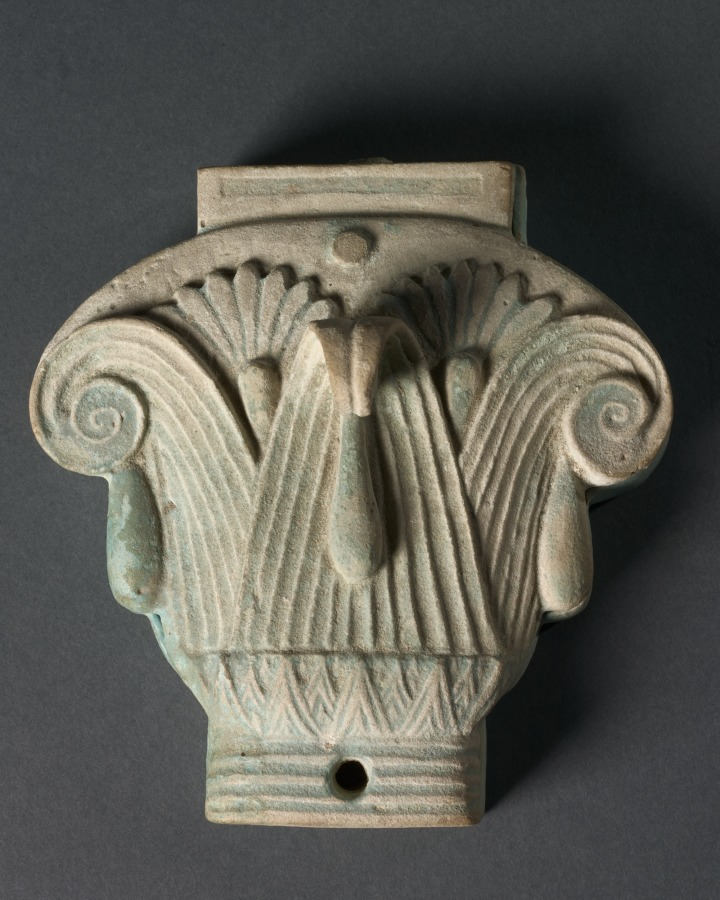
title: Box (Pyxis) in the Form of a Composite Capital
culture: Egypt, Greco-Roman period (332 BCE–395 CE), Ptolemaic dynasty (305–30 BCE)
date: 305–30 BCE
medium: pale robin's-egg blue faience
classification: Vessels